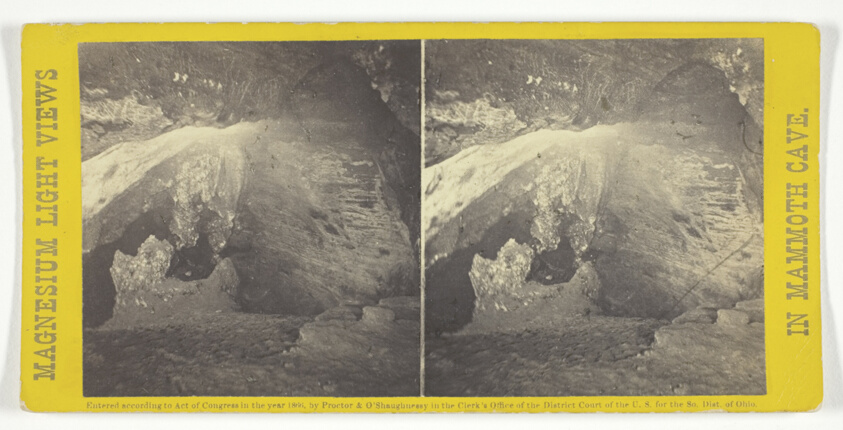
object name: Photograph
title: Angelica's Grotto, No. 26 from the series "Mammoth Cave Views"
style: 19th century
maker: Chas. Waldack (American, active 1860s)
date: 1866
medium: Albumen print, stereo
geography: New York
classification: photography; photograph